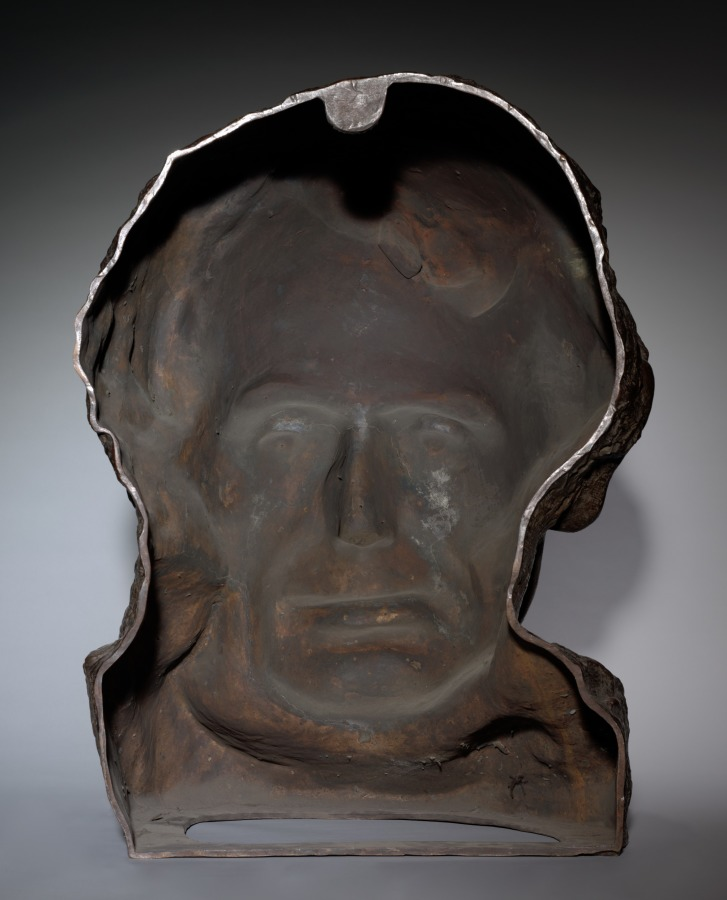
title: Head of Lincoln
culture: America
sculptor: Gutzon Borglum (American, 1867–1941)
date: 1908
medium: bronze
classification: Sculpture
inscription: Signed and dated on left of base: "Gutzon Borglum, 1908"